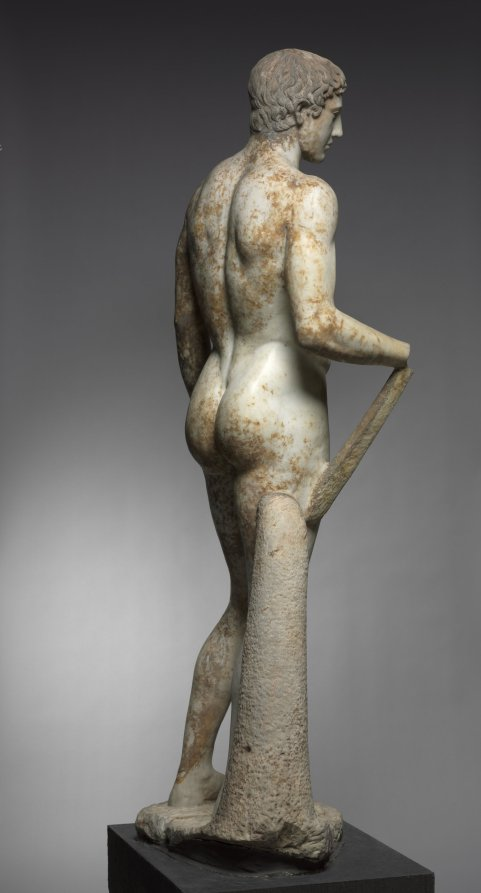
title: Statue of an Athlete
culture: Italy, Roman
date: 1–100 CE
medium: marble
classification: Sculpture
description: This idealized athlete recalls Greek sculptural types invented and popularized during the 400s BC. Large-scale athletes and other sculptures like this were originally created by famous artists as sanctuary dedications. Centuries later, they were widely copied and adapted by Roman sculptors, whose clients sought their own versions of earlier masterpieces. Working in marble rather than bronze, these sculptors added certain elements for stability, such as the struts and the large tree trunk beside the right leg here. Sculptures like this one are profoundly complex, made by and for Romans but descended from Greek ancestors.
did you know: For many years, this sculpture stood in the rotunda of the Cleveland Museum of Art.